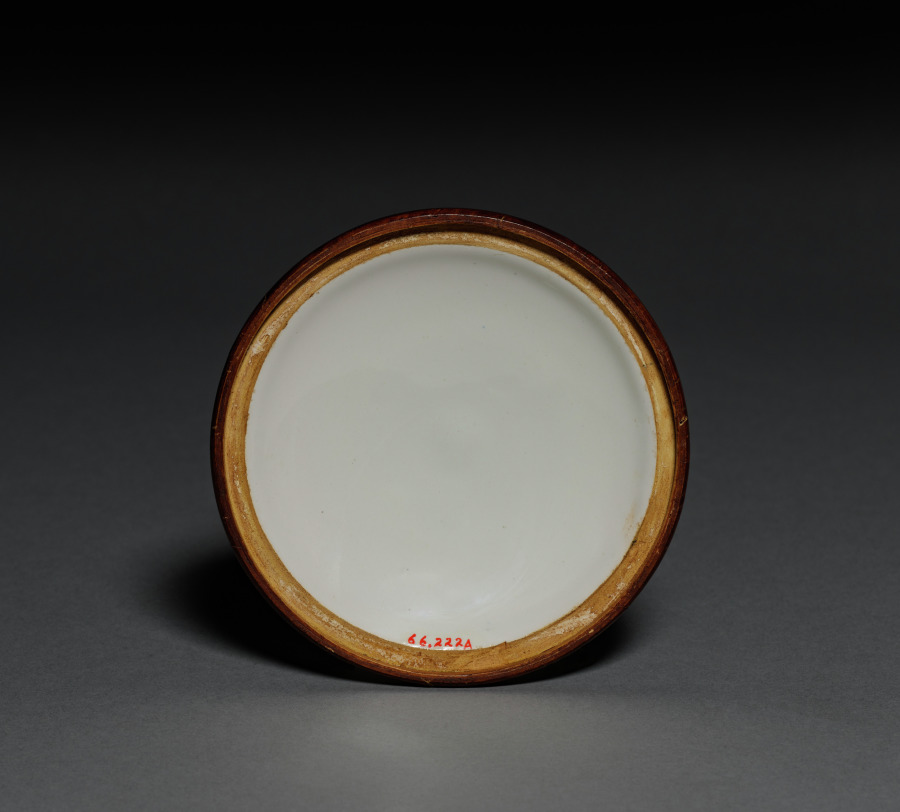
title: Cover for a Box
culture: France, Moustiers, 18th century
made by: Olerys Factory (French)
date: c. 1750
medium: faience encased with burled wood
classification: Ceramic